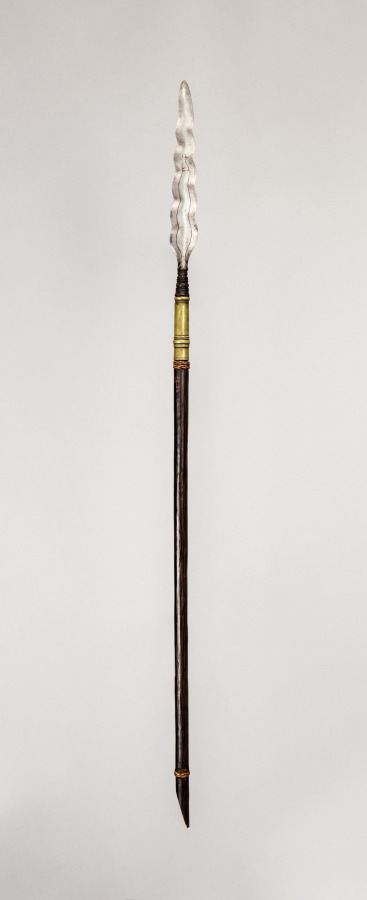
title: Spear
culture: Philippines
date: before 1922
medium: Point: metal and brass ferrule; handle: wood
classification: Arms and Armor